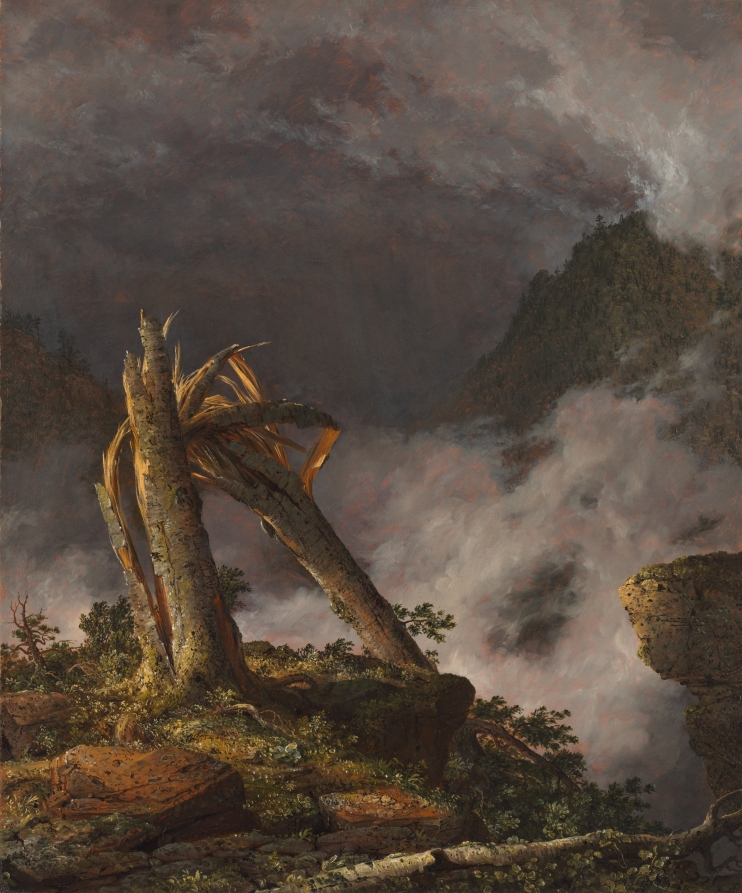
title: Storm in the Mountains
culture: America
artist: Frederic Edwin Church (American, 1826–1900)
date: 1847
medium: oil on canvas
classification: Painting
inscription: Signed in center on tree: "F. CHURCH. 1847"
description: Dominating this composition is a lightning-blasted tree embodying nature's awe-inspiring power and endless cycle of life and death. A popular motif because of these associations, the blasted tree was favored by many landscape painters like Church, who prominently featured it here.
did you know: Church's spectacular home and studio, named Olana, is preserved as a New York State Historical Site.